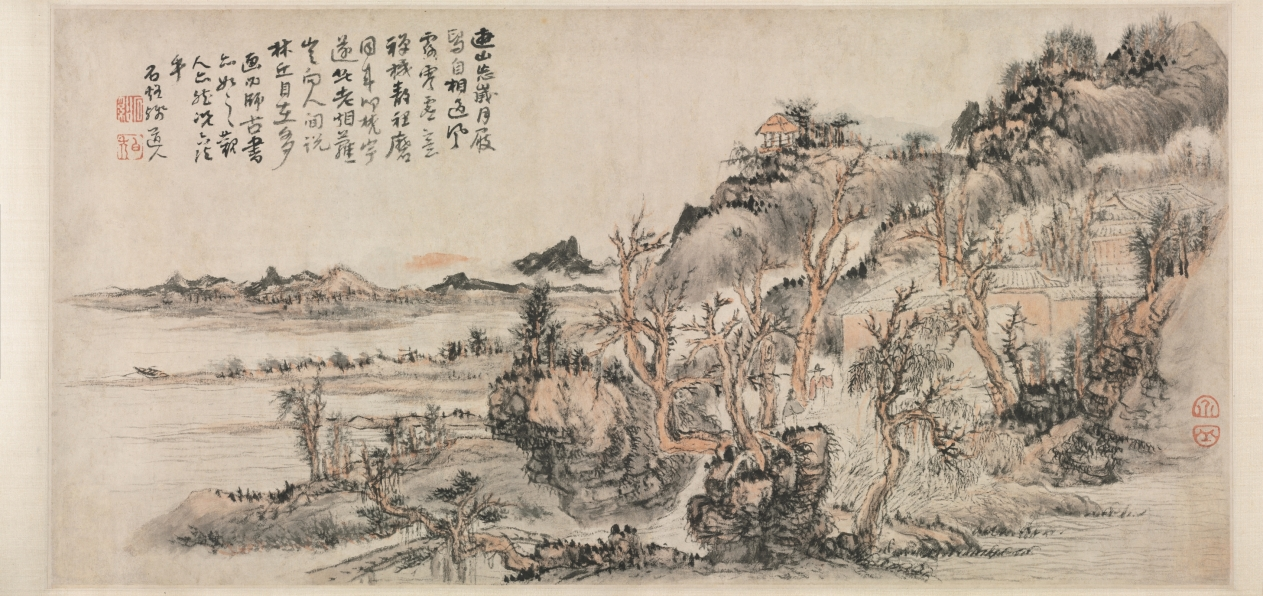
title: Spring Landscape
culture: China, Qing dynasty (1644–1911)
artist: Kuncan (Chinese, 1612–c. 1673)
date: 1666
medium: double album leaf mounted as a handscroll; ink and color on paper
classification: Painting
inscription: 遊山忘歲月，屐舄自相過。 風露寒虚意，禪機靜裡磨。 同年叩梵宇，遂此老煙蘿。 豈向人間說，林丘自在多。 畫必師古，書亦如之。觀人亦然，况六法乎。石谿殘道人 印二：石谿，白秃。另有「介丘」一印在右邊。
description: One of the acclaimed "Four Monks" (the other three being Zhu Da, Daoji, and Hongren), Kuncan was known for the rough and rustic style of his landscape paintings. This painting was once part of a large album, painted at the request of his friend Cheng Zhengkui (active 1630–74), with whom he shared a common interest in painting and poetry. The inscription contains a poem, which reads: Wandering through mountains and oblivious of time, We met in casual shoes (and attires). The wind and dew drops harbor a chilling emptiness. Only with patience and silence can the Chan inspiration come. . . .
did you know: This spring scene was once accompanied by album leaves of summer (now in the Museum für Asiatiche Kunst, Berlin) and autumn and winter (now in the British Museum).